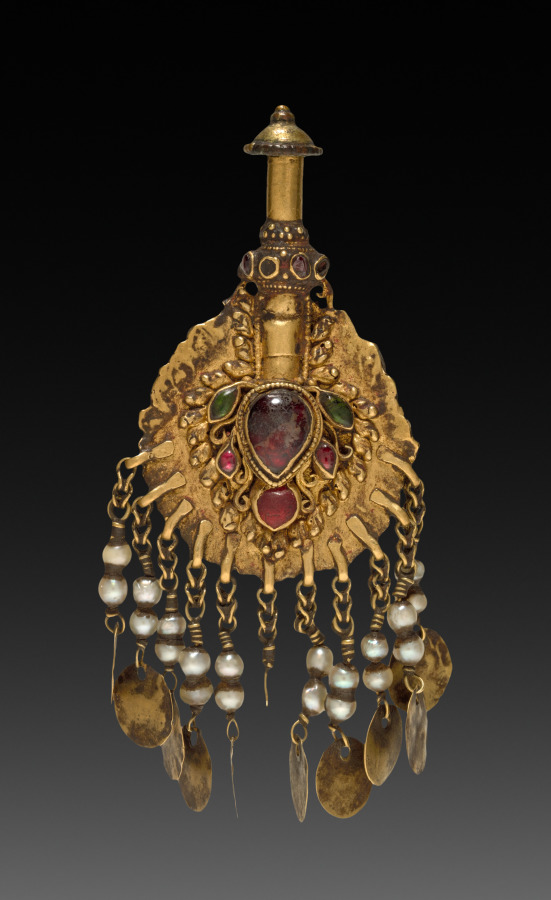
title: Earring with Vishnu Riding Garuda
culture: Nepal, Kathmandu Valley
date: 1600s or 1700s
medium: Gold set with precious and semiprecious stones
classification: Jewelry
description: This earring was made to hang on sculptures of deities worshipped in Nepalese temples. Nepalese craftsmen excelled at the detailed encrustation of jewels to depict complex figural imagery. They shaped gold wires into a framework, then inserted polished stones into the spaces, held in place with an adhesive. Four-armed Vishnu is made of sapphires; his mount the man-eagle appears to be made of carnelian and spinel with wings of turquoise.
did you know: Jeptha Homer Wade II and his wife bought this and other jewelry and textiles on a trip to India.